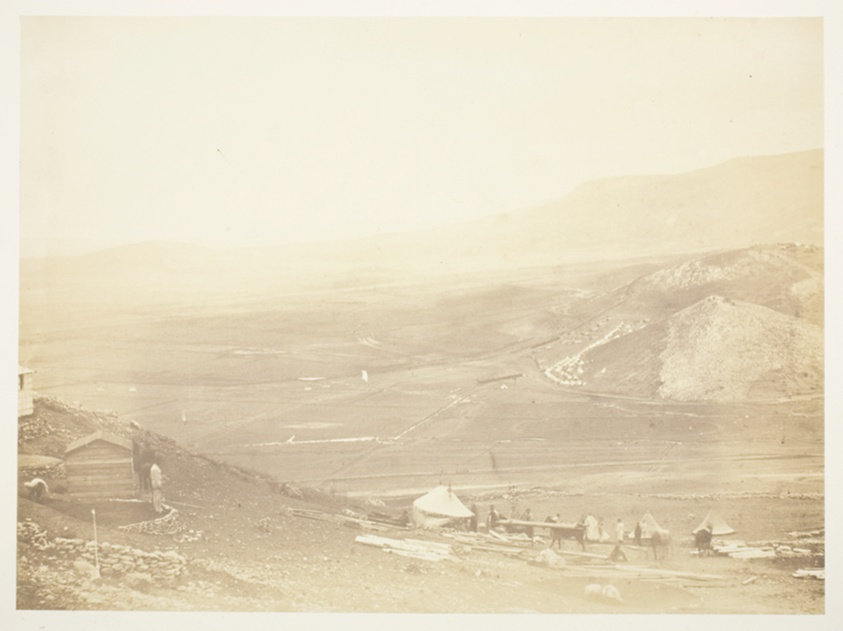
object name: Photograph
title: The Lines of Balaklava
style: 19th century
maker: Roger Fenton (English, 1819–1869)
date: 1855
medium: Salted paper print, from the album "Photographic Pictures of the Seat of War in the Crimea" (1856)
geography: England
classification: salted paper print; photographic process; photography; photograph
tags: Collected by Hugh Edwards